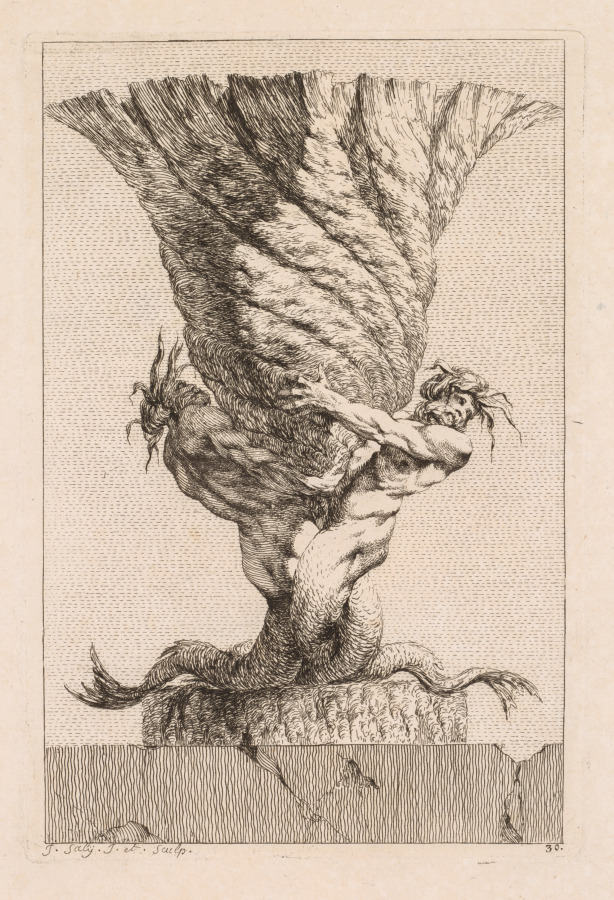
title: Suite of Vases: Plate 30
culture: France, 18th century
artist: Jacques François Saly (French, 1717–1776)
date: 1746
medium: etching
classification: Print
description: Designing ornamental vases or urns was particularly popular during the mid-18th century since the only limit to the possibilities was the imagination of the artist. Saly, a sculptor by training, was a student at the French Academy in Rome from 1740 to 1746, at which time he published a set of 30 etchings. Saly began with basic antique vase forms but deviated from classical ornament to use a rich variety of fantastic creatures for embellishment.